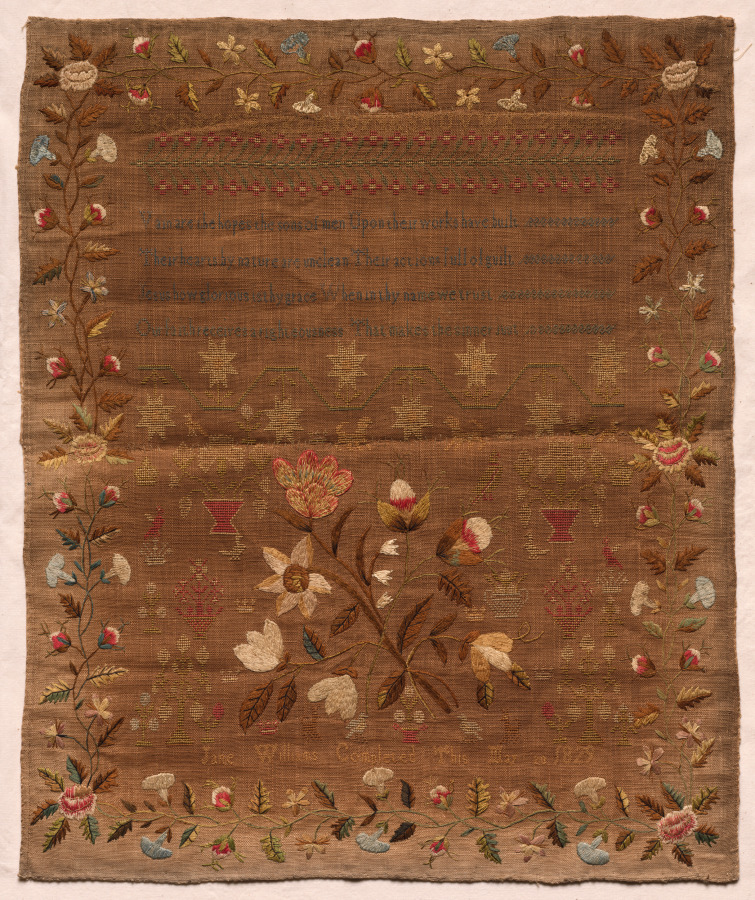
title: Sampler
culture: England, 19th century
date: 1829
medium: embroidery: silk on linen tabby ground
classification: Sampler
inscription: alphabet and numerals from one to six at top; verse; signed at bottom: "Jane Williams Completed This May 20, 1829.